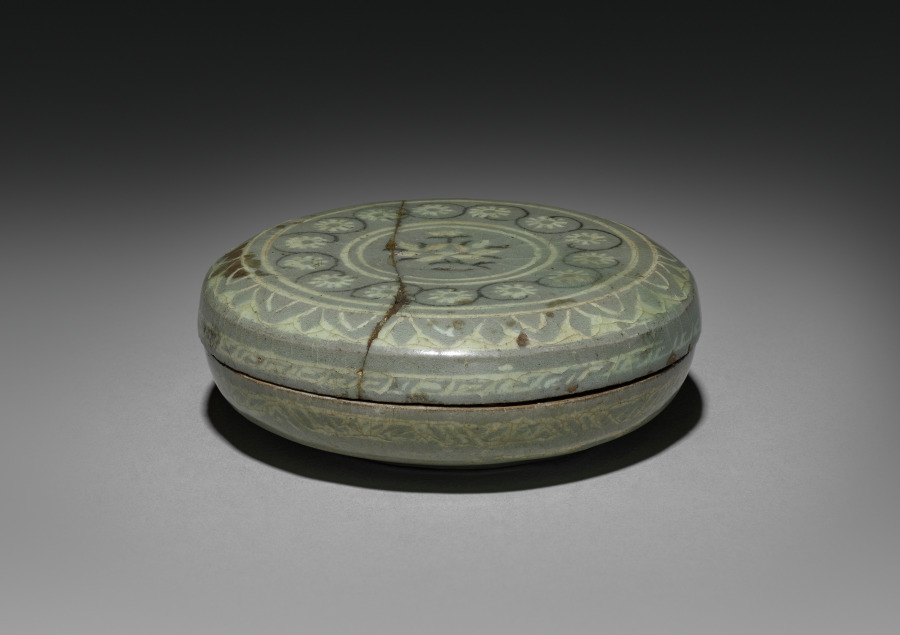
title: Box and Cover with Chrysanthemum and Scroll Design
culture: Korea, Goryeo dynasty (918–1392)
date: 1200s-1300s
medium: inlaid celadon ware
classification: Ceramic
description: Celadons, spoons, seals, and bronze mirrors were the most common burial objects in tombs during the Goryeo period (918–1392). Once used to contain colored powder, rouge, and eyebrow gel for makeup, this small container was one of the standard goods that furnished elites' tombs. Both women and men used the grain powder of rice or millet for whitening their skin, safflower extract for rouge, and plant ash or soot for eyebrow gel. Yet, natural-looking makeup seems to have been the most favorable one in Korea according to the travelogue by Xu Jing (1091–1153), the Chinese diplomat who visited Korea in 1123.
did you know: This ceramic container was used to store either incense or cosmetics.